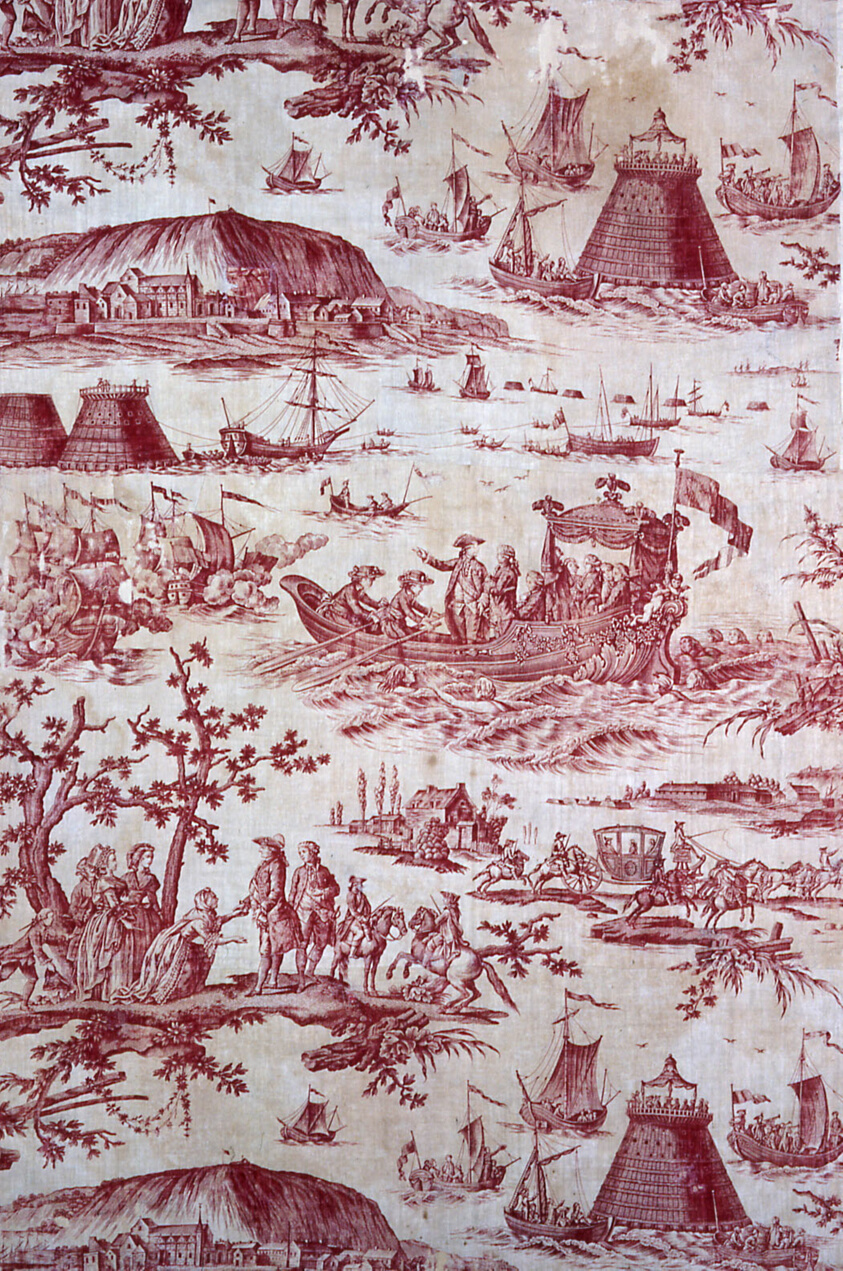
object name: Textile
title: The Inauguration of The Port of Cherbourg by Louis XVI (Furnishing Fabric)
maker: Designed by Jean Baptiste Huet (French, 1745–1811) after cartoon by Pierre Ozanne (French, 1737-1815); Manufactured by Petitpierre et Cie (French, 1760/70-1791); Nantes, France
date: c. 1787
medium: Cotton, plain weave; copperplate printed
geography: Nantes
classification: textile; weaving - printed; furnishing textile